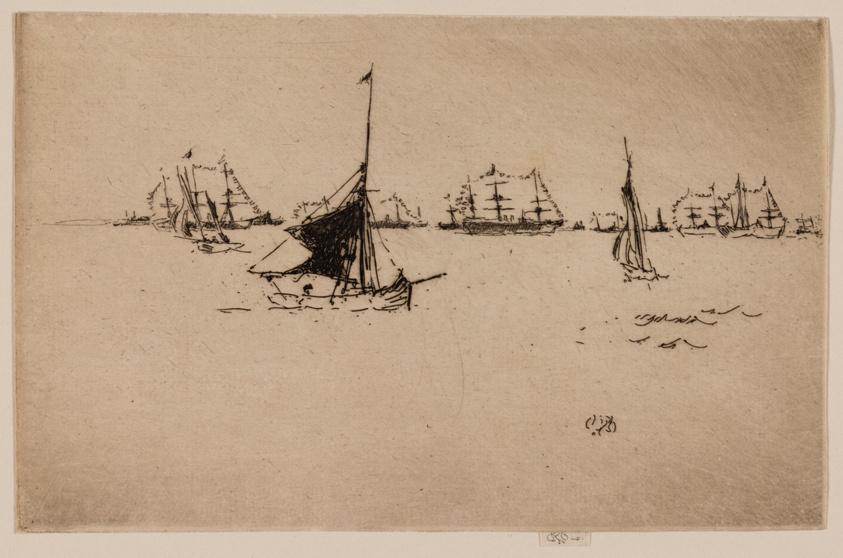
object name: Print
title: Her Majesty's Fleet: Evening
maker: James McNeill Whistler (American, 1834-1903)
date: 1887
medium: Etching and drypoint with foul biting in black ink on ivory laid paper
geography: United States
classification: etching; foul biting; print; prints and drawing; drypoint; paper